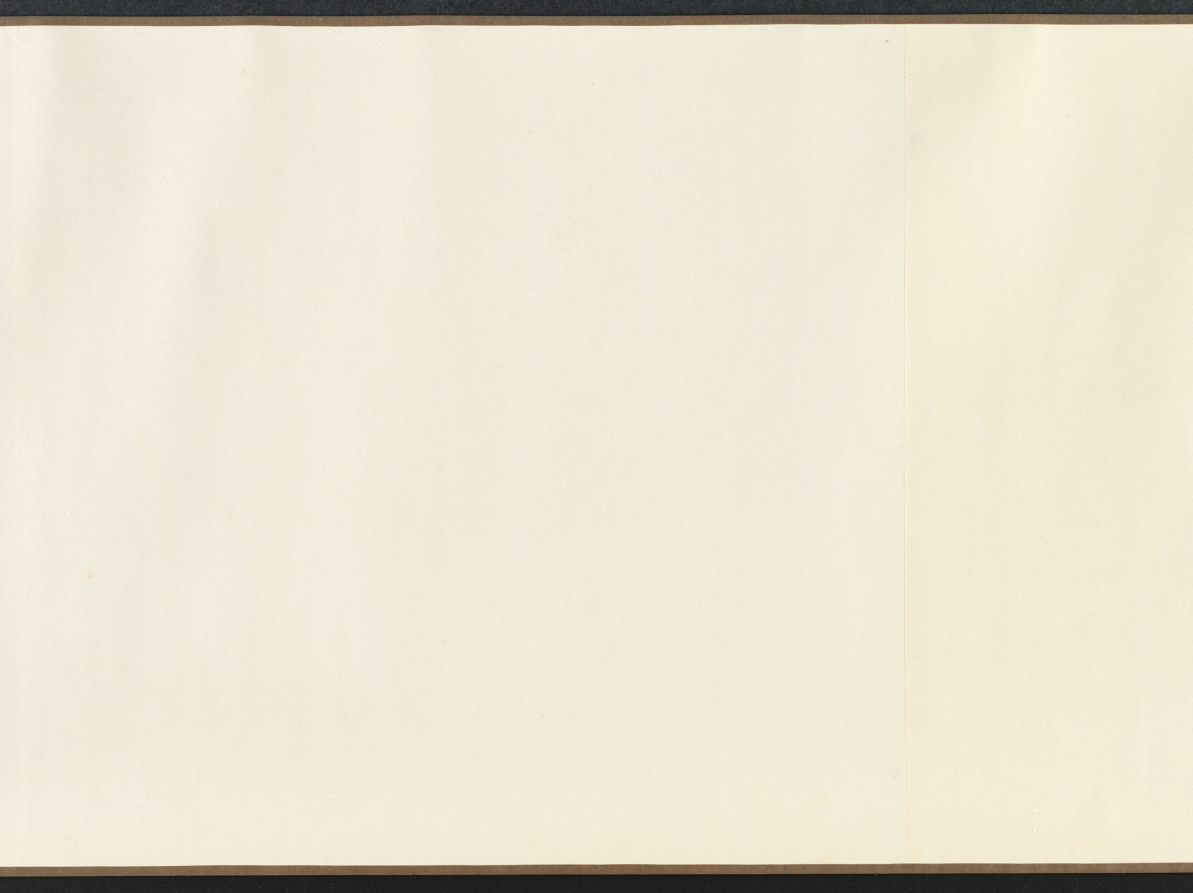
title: Ink Flowers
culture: China, Yuan dynasty (1271-1368)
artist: Zhao Zhong (Chinese, second half of the 1300s)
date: 1361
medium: Handscroll; ink on paper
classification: Painting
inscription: 寶帶同心結，香羅合歡扇。/ 繡作錦鴛鴦，雙雙為君獻。/ 薔薇露灑熏籠衣，馨香奉君君勿違。 原初并題。 [印] 趙衷原初畫記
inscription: 翠袂素羅韈，玉臺黃金盃。浩歌渡弱水。天風卷海三山開，麻姑方平為招飲，蛟宮獻舞銀濤堆。 原初并題。 [印] 雲林清趣、[印] 趙衷原初畫記。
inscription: 右用湯叔雅慶元中所寫墨花法作此卷，又效李長吉體賦詩以題之。詩與畫雖未工，要皆出於古人之餘，譬猶欲成方圓而必求其規矩之用也，識者毋誚焉！至正辛丑八月望日，東吳野人趙衷原初謹識。 [印] 趙原初、[印] 傳世清玩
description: Zhao Zhong's flowers, each paired with a poem, echo the fine-style colored flowers of the academic tradition, but instead he used only ink. Fine lines define the contours of each plant, as well as the veins within each petal and leaf. Careful ink washes give subtle modeling to the forms. The combination of lily, narcissus, and peony is unusual as the three belong to no known seasonal or symbolic system popular in the fourteenth century. Zhao’s medical training may have influenced the selection. Powdered lilies, for example, were prescribed to dispel grief, while the bark of tree peony roots was used as a treatment for various blood disorders.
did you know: This handscroll is a very rare example of ink flowers in the linear baimiao style of the fourteenth century.